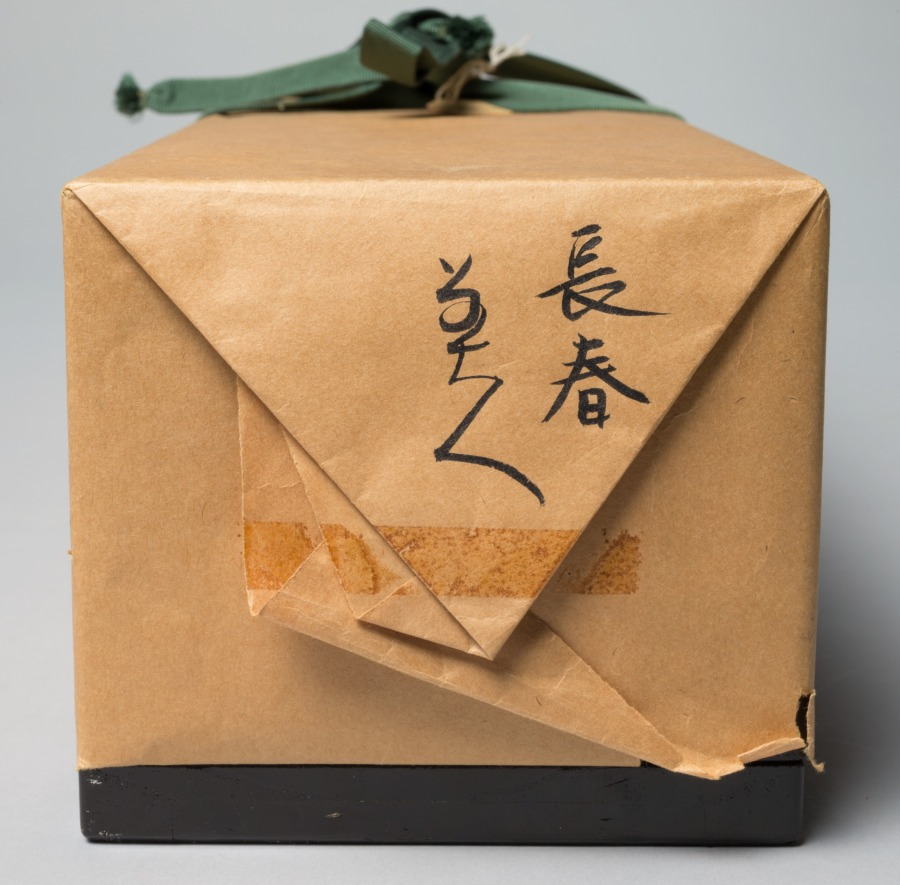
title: Spring Dancers (Manzai)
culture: Japan, Edo period (1615–1868)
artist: Miyagawa Chōshun (Japanese, 1683–1753)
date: early to mid-1700s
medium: hanging scroll; ink and color on paper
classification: Painting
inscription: Artist's signature and gourd-shaped seal lower right corner.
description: Manzai is the Japanese term for wandering comic dancers. The painting depicts one of the traditional pleasures of the spring season.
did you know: One performer is playing a hand-held drum, like CMA 1918.349.